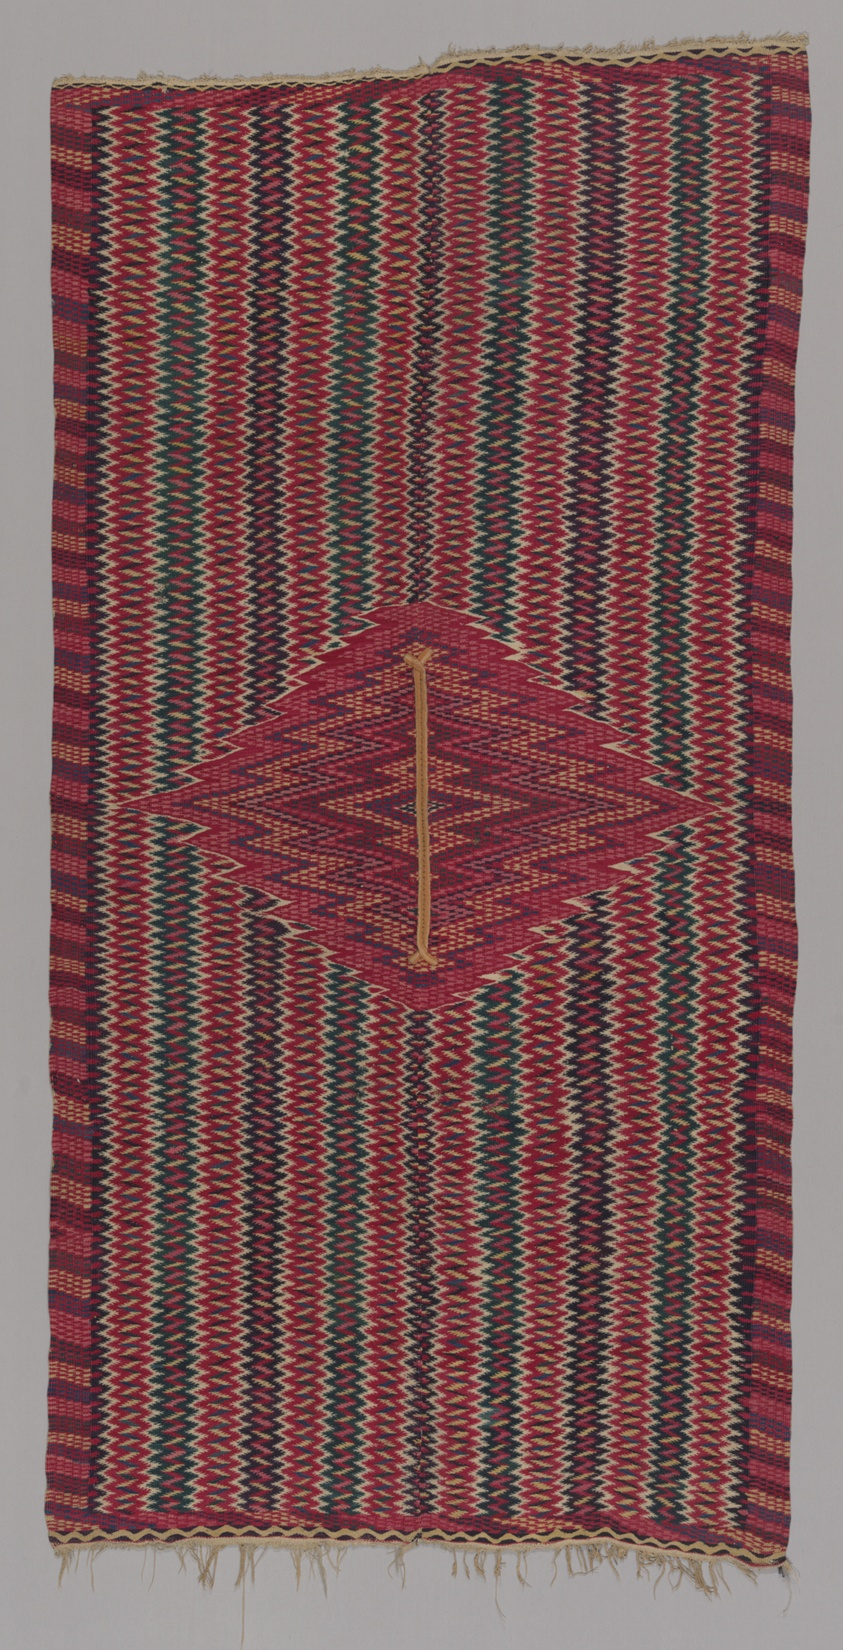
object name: Textile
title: Sarape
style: Folk Art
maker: Mexico, possibly Saltillo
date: 1750/1800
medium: Cotton and wool, single dovetail tapestry weave; neck edge tapes of cotton, plain weave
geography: Mexico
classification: textile; weaving